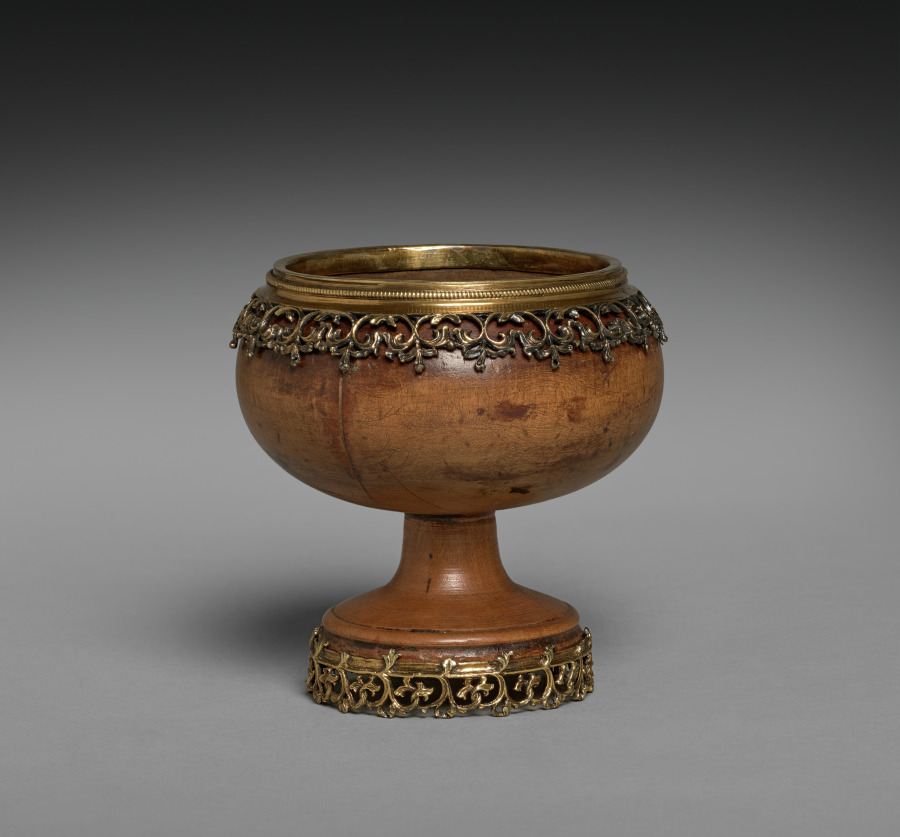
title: Double Cup (Mazer) (lid)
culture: Germany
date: c. 1530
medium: maple wood with gilt-silver mounts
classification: Wood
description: A characteristic form of drinking vessel made of close-grained wood, especially maple, was developed in Germany as early as the thirteenth century. It consisted of a larger cup with a foot and a handle and a smaller cup on top. The upper one served as a lid but could also be removed and used as a separate drinking vessel. In this example the smaller upper cup is inset with a memorial portrait medallion of Albrecht Dürer made in the year of his death, 1528. The medal is the work of Matthes Gebel who was active in Nuremberg and Augsburg as a medallist from 1523 to his death in 1574. The reverse of the medal is set into the base of the larger lower cup.